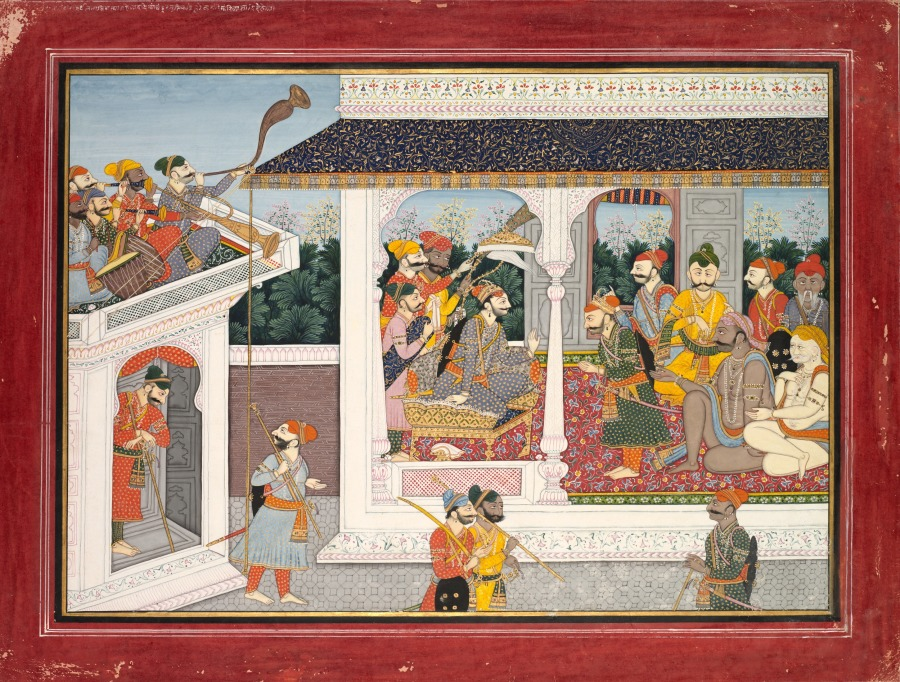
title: Kamsa deploys Akrura and Keshi to Braj, from a Bhagavata Purana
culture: Northern India, Pahari kingdoms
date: c. 1830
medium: Gum tempera, ink, and gold on paper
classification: Painting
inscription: [[recto, in Nagari]] 36. sabhā vica sthīta ho sadī denyā caṁdura muṣtika akrūre ke sadi kari ajnā diṁde hoā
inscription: [[verso, in Gurmukhi]] 36. dhiāi. 112. ‘tade kaṁsa sabhā bica akarura nū ākhaā tūṁ lai aaū krisna jī nū te kesī nū ākhaā bhaī jāike gokala bica māra krisna ji.’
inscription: [[verso, in Sanskrit]] pratiyāte tu devarṣau kaṁsa ābhāṣya keśinam preṣayām āsa hanyetāṁ bhavatā rāma mādhavau. 22. tato muṣṭika cāṇūra śala tośalakādikān amātyān hastipāṁś caiva samāhūyāha bhoja-rāṭ. 23. bho bho niśamyatām etad vīra cāṇūra muṣṭikau nanda vraje kilāsāte sutāv ānakadundubheḥ. 24. rāma-kṛṣṇau tato mahyaṁ mṛtyuḥ kila nidarśitaḥ bhavadbhyām iha samprāptau hanyetāṁ malla-līlayā. 25. mañcāḥ kriyantāṁ vividhā malla raṅga-pariśritāḥ paurā jānapadāḥ sarve paśyantu svaira-saṁyugam. 26. mahāmātra tvayā Bhadra raṅga-dvāry upanīyatām dvipaḥ kuvalayāpīḍo jahi tena mamāhitau 27. ārabhyatāṁ dhanur-yāgaś caturdaśyāṁ yathā-vidhi viśasantu paśūn medhyān bhūta-rājāya mīḍhuṣe jahi tena mamāhitau. 28. ity ājñāpyārtha-tantra-jña āhūya yadu-puṅgavam gṛhītvā pāṇinā pāṇiṁ tato ’krūram uvāca ha. 29. bho bho dāna-pate mahyaṁ kriyatāṁ maitram ādṛtaḥ nānyas tvatto hitatamo. vidyate bhoja-vṛṣṇiṣu. 30. atas tvām āśritaḥ saumya kārya-gaurava-sādhanam yathendro viṣṇum āśritya svārtham adhyagamad vibhuḥ vidyate bhoja-vṛṣṇiṣu. 31. gaccha nanda-vrajaṁ tatra sutāv ānakadundubheḥ āsāte tāv ihānena rathenānaya mā ciram. 32. nisṛṣṭaḥ kila me mṛtyur devair vaikuṇṭha-saṁśrayaiḥ tāv ānaya samaṁ gopair nandādyaiḥ sābhyupāyanaiḥ. 33. ghātayiṣya ihānītau kāla-kalpena hastinā yadi muktau tato mallair ghātaye vaidyutopamaiḥ. 34. tayor nihatayos taptān vasudeva-purogamān tad-bandhūn nihaniṣyāmi vṛṣṇi-bhoja-daśārhakān. 35. ugrasenaṁ ca pitaraṁ sthaviraṁ rājya-kāmukaṁ tad-bhrātaraṁ devakaṁ ca ye cānye vidviṣo mama. 36. tataś caiṣā mahī mitra bhavitrī naṣṭa-kaṇṭakā jarāsandho mama gurur dvivido dayitaḥ sakhā. 37. śambaro narako bāṇo mayy eva kṛta-sauhṛdāḥ tair ahaṁ sura-pakṣīyān hatvā bhokṣye mahīṁ nṛpān. 38. etaj jñātvānaya kṣipraṁ rāma-kṛṣṇāv ihārbhakau dhanur-makha-nirīkṣārthaṁ draṣṭuṁ yadu-pura-śriyam. 39. śrī-akrūra uvāca rājan manīṣitaṁ sadhryak tava svāvadya-mārjanam siddhy-asiddhyoḥ samaṁ kuryād daivaṁ hi phala-sādhanam. 40. manorathān karoty uccair jano daiva-hatān api yujyate harṣa-śokābhyāṁ tathāpy ājñāṁ karomi te. 41. evam ādiśya cākrūraṁ mantriṇaś ca viṣṛjya saḥ praviveśa gṛhaṁ kaṁsas tathākrūraḥ svam ālayam. 42. iti śrī bhāgavate daśama skaṁde pūrvārdhe ṣanḍiśaḥ 36.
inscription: [[verso, in Nagari]] adhyā[ya] 36 citra 114. 114 citra adhyāye 36 kaṁśa akrūre ki sadi kari chandūr muṣtika ājnā diṁde hoe.